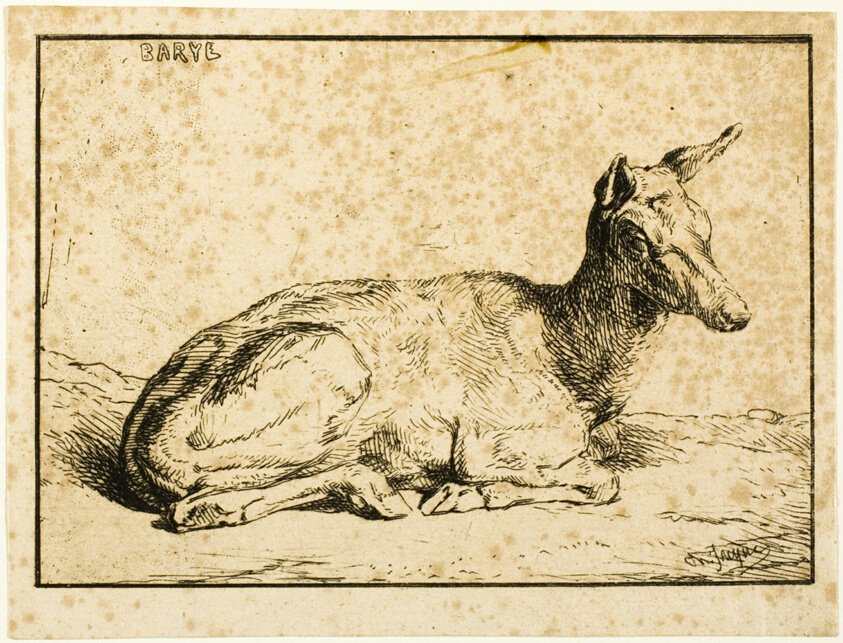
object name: Print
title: A Doe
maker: Charles Émile Jacque (French, 1813-1894); after Antoine Louis Barye (French, 1795-1875)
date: 1846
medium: Etching on cream wove paper laid down on ivory laid paper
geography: France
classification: etching; print; prints and drawing